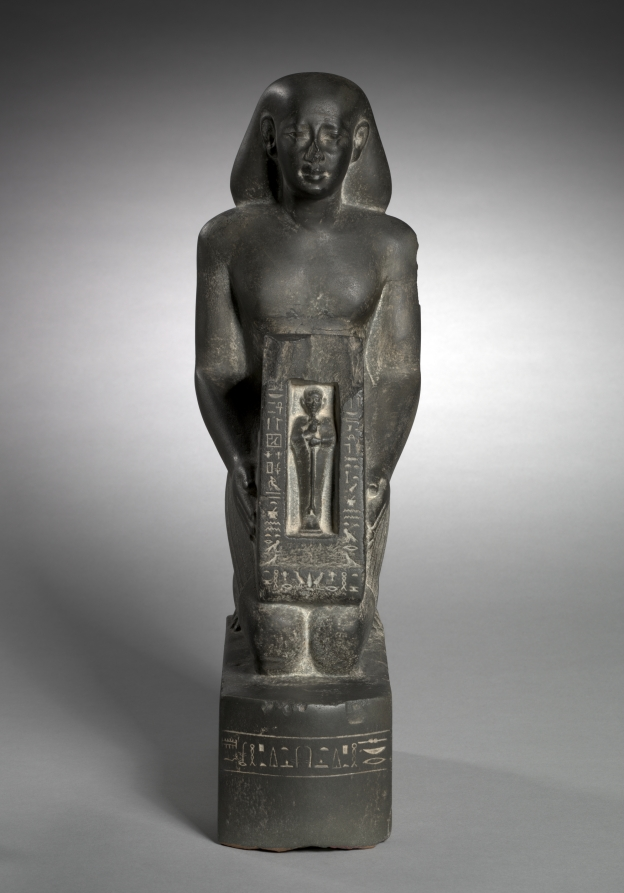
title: Naophorous Statue of the Finance Officer and Overseer of Fields, Horwedja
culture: Egypt, Late period (715–332 BCE), Dynasty 27, reign of Darius I (522–486 BCE)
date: 521–486 BCE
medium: graywacke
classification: Sculpture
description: Naophorous (naos.bearing) statues show the subject holding a naos, or shrine, containing an image of a deity, in this case the god Ptah of Memphis. These statues were very popular during the Late Period. Almost invariably they are of hard stone, made to last for eternity. As finance officer under Darius I, Horwedja was in a good position to afford such a monument. Darius I was the second Persian king to rule over Egypt and the only one who seems to have had a genuine appreciation of the country. Egypt prospered under his rule, and the arts flourished.